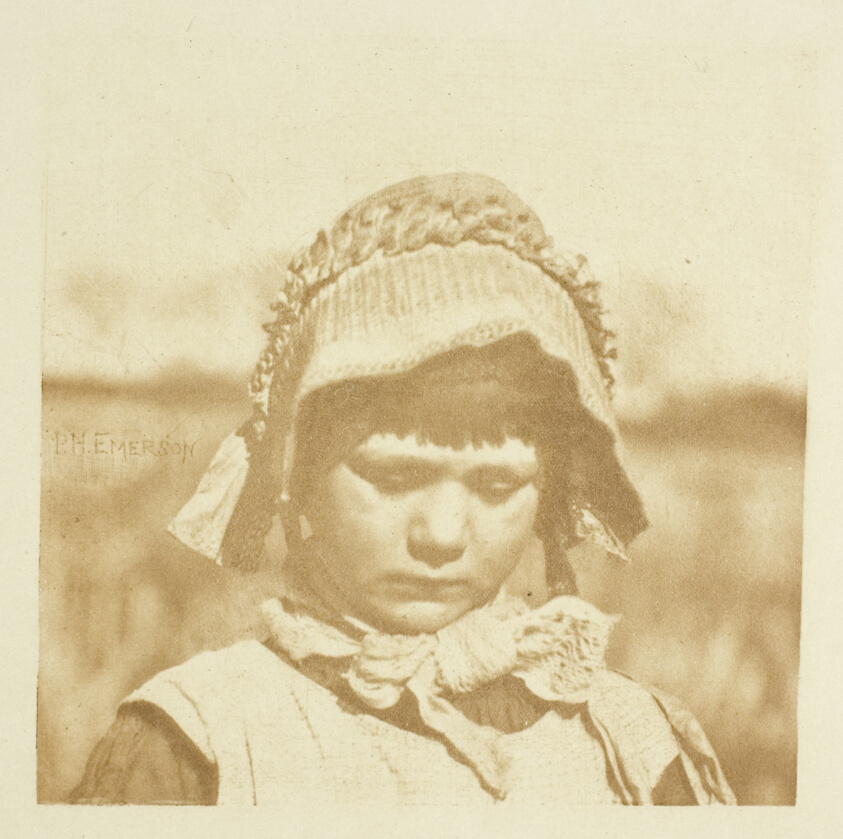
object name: Photograph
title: A Norfolk Flower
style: 19th century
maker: Peter Henry Emerson (English, born Cuba, 1856–1936)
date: 1883/87, printed 1888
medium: Photogravure, pl. XXXII from the album "Pictures of East Anglian Life" (1888)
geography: England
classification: photogravure; photomechanical process; photography; photograph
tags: Collected by Hugh Edwards, Pictures of East Anglian Life, Seat of War in the Crimea